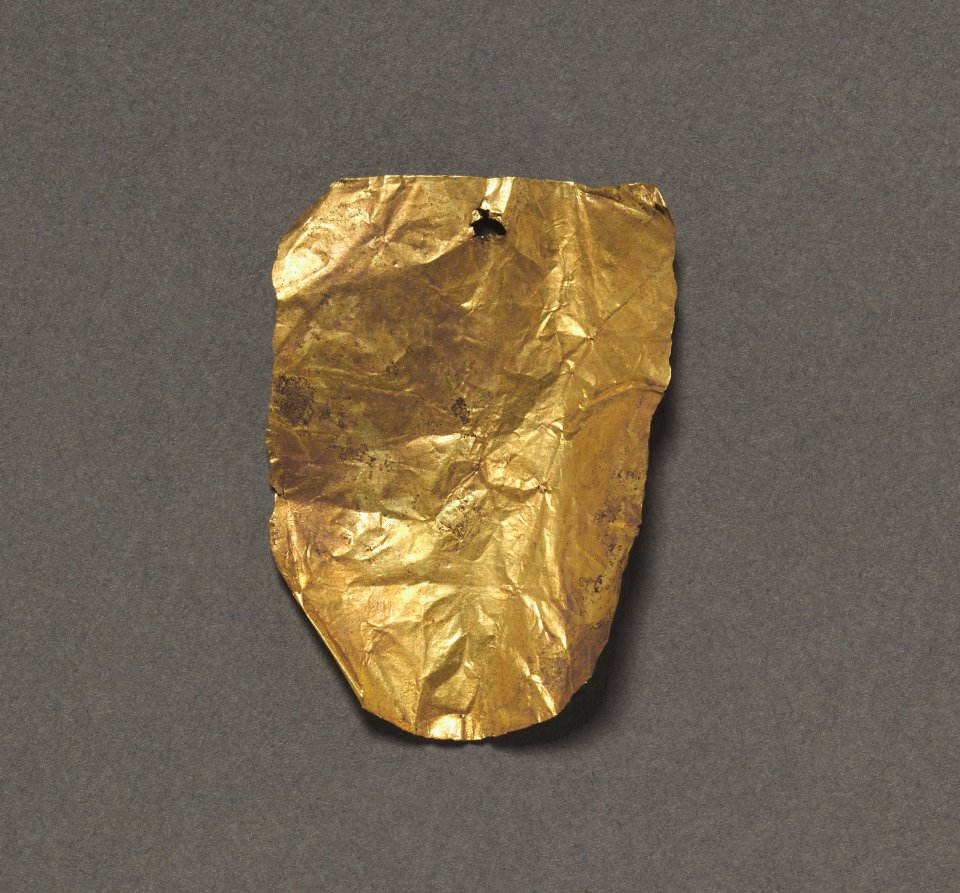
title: Tongue Plate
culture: Egypt, Greco-Roman period (332 BCE–395 CE), Roman empire (30 BCE–395 CE)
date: 30 BCE–395 CE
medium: gold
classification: Funerary Equipment